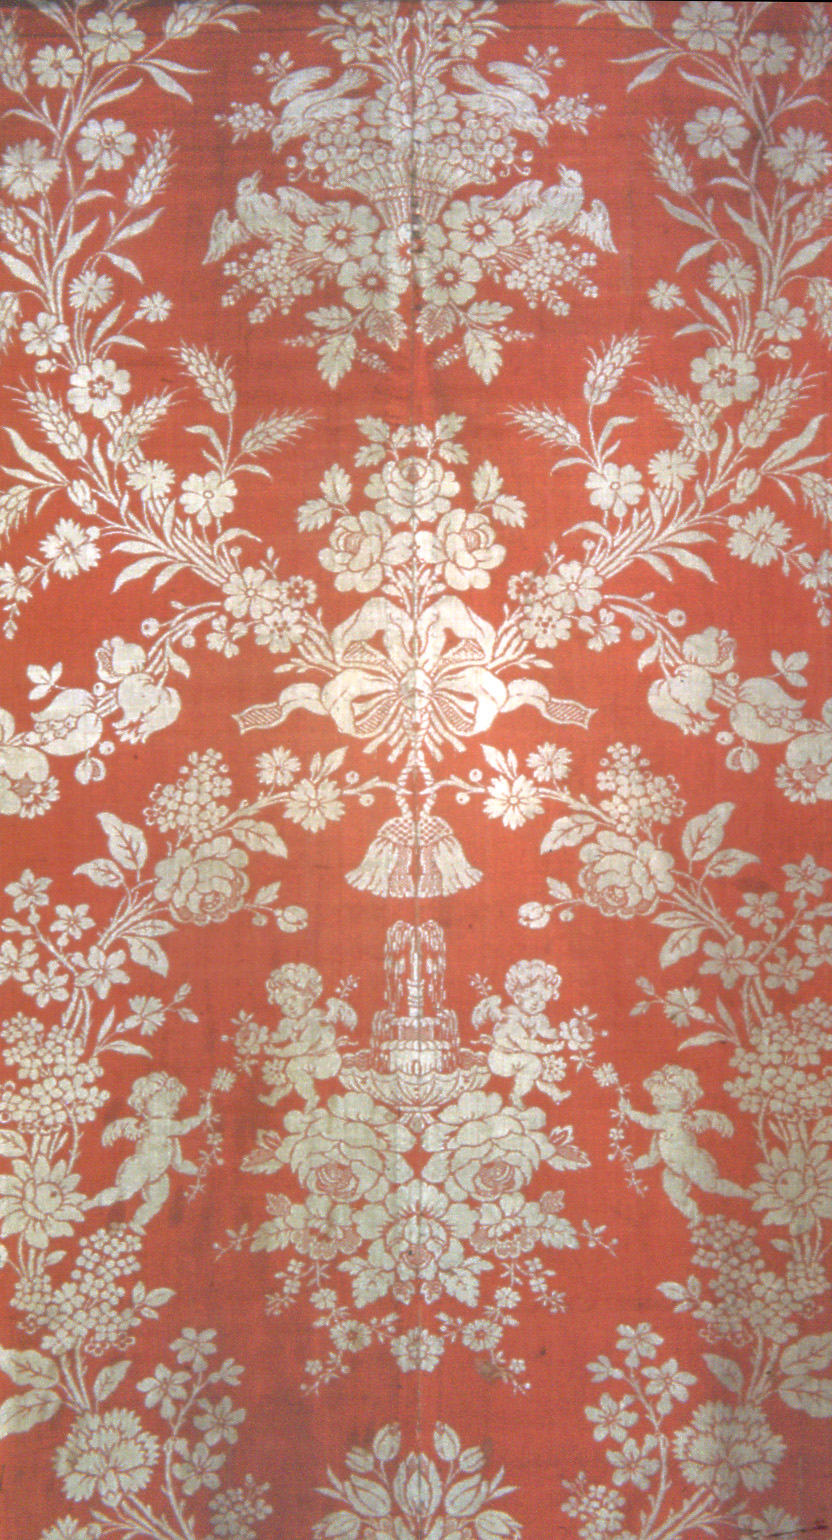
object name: Textile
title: Panel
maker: France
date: 1775/1800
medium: Silk, warp-float faced 4:1 satin weave with plain interlacings of secondary binding warp and supplementary patterning wefts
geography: France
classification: textile; weaving